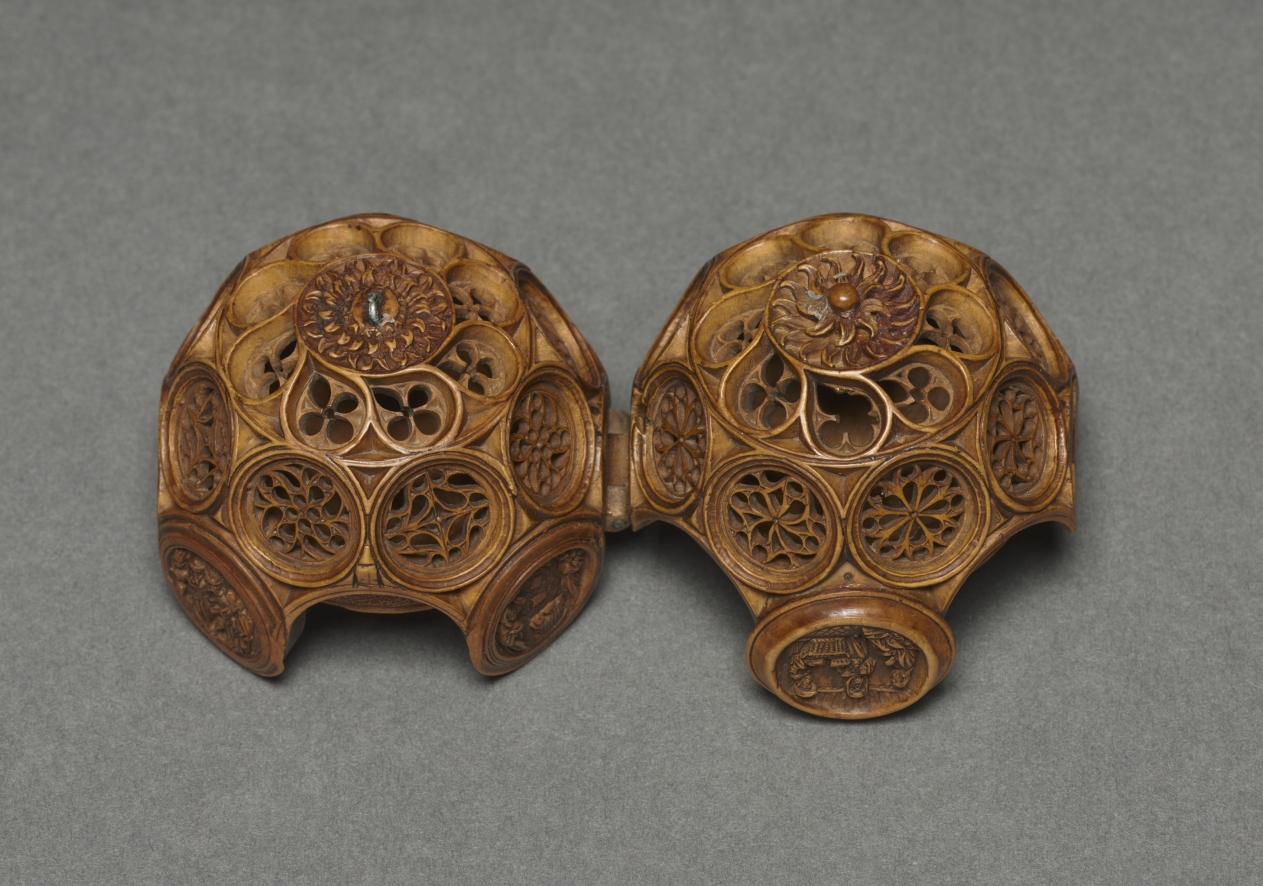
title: Prayer Nut with Scenes from the Life of St. James the Greater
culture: Northern Netherlands (Holland)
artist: Adam Dircksz (Netherlandish, active c. 1500)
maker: and Workshop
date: c. 1500–1530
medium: boxwood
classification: Sculpture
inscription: Interior around lower half: SANCTVS SACRILEGI STAT IVDICIS ANTE TRIBVNAL (Holiness stands before the throne of the profane judge)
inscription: Interior, around upper half: GAVDENS PRO CRISTO IACOBVS SVBDIT CAPVT ENSI (St James submits his head to the sword)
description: Prayer nuts are capsules that can be opened in half and were mainly worn from the end of the 1400s until 1530, particularly in the Netherlands. These objects are generally made from boxwood and carved with extreme refinement and delicacy. They often echo Gothic architecture and include openwork tracery or elaborate decorative patterns. Prayer nuts came into fashion for private devotion as a pendant on the rosary or on a decorative chain. The emergence of prayer nuts went hand in hand with the practice of praying the rosary more frequently at the end of the Middle Ages.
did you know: This miniature masterpiece was held and caressed within the palm of the holder as they prayed and meditated on their faith. What do you use to focus or engage in quiet concentration?